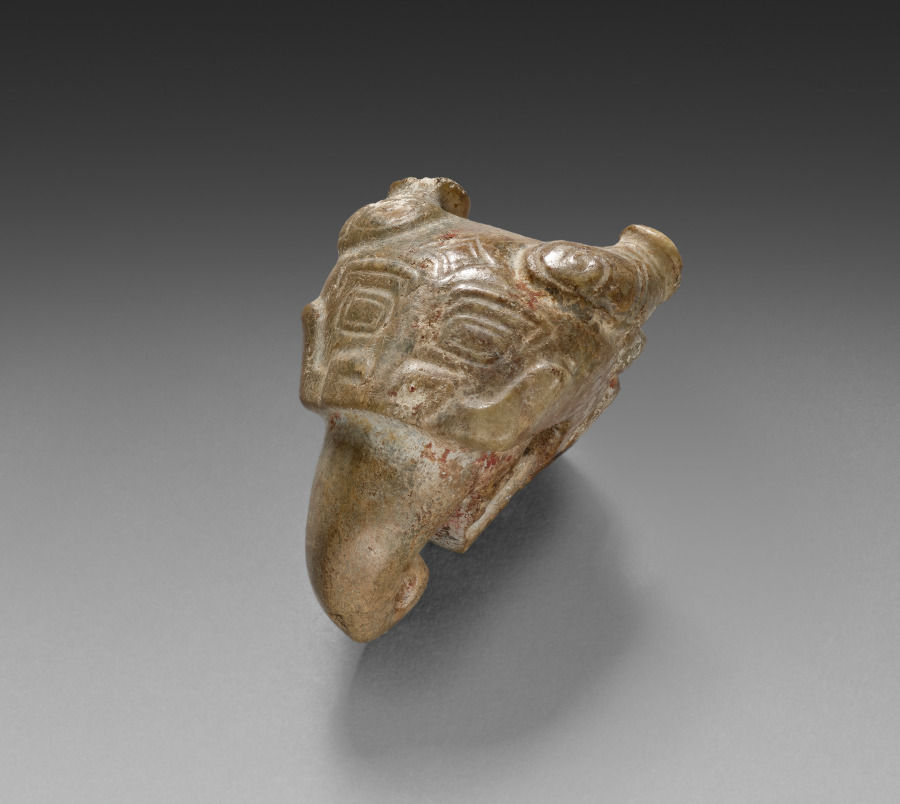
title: Feline Head with Bovine Horns and Elephant Trunk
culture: China, Shang dynasty (c. 1600–c. 1046 BCE)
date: 1300–1000 BCE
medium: jade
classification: Jade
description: This small jade was shaped into a fantastic, composite animal: a feline form with bovine horns and an elephant's trunk.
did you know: The mouth, the underside of the nose, and the tapering hole for attachment at the rear of the head were cut by drilling.